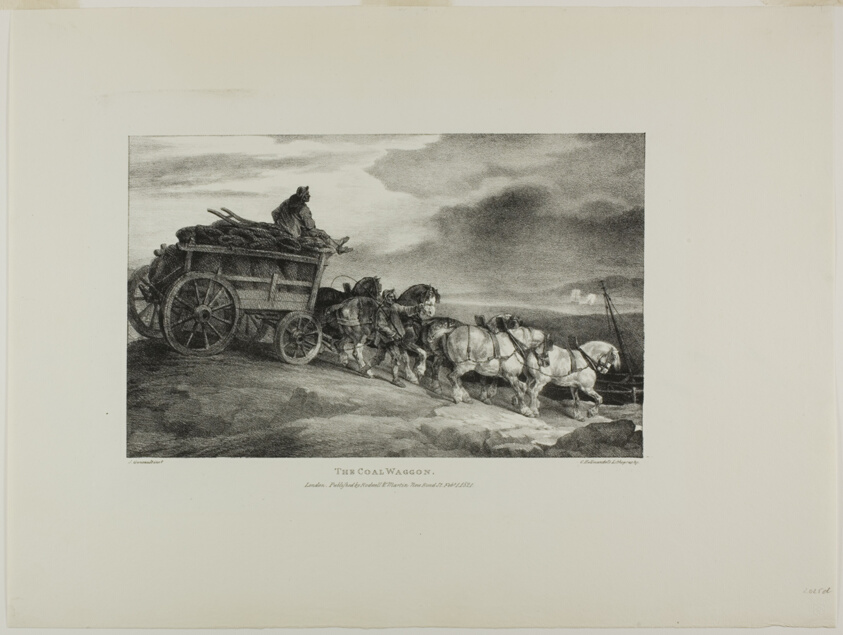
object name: Print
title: The Coal Wagon, plate 7 from Various Subjects Drawn from Life and on Stone (The English Suite)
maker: Jean Louis André Théodore Géricault (French, 1791-1824); printed by Charles Joseph Hullmandel (German and English, 1789-1850); published by Rodwell and Martin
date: February 1821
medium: Lithograph in black on ivory wove paper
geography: France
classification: lithograph; print; prints and drawing